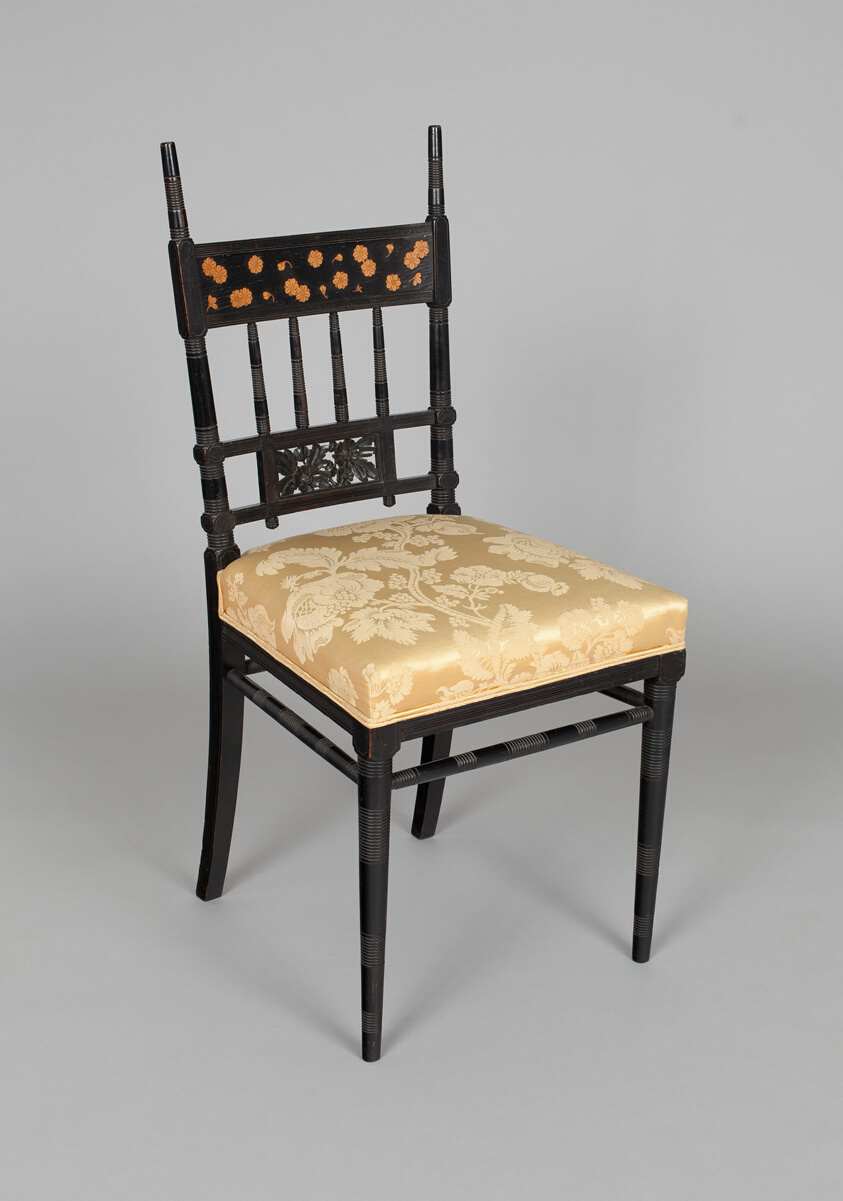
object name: Furniture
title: Side Chair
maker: Herter Brothers (American, 1864–1906); New York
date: 1877–85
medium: Ebonized cherry, various inlaid woods, and upholstery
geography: New York City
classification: seating; furniture; american decorative arts; american arts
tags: furniture